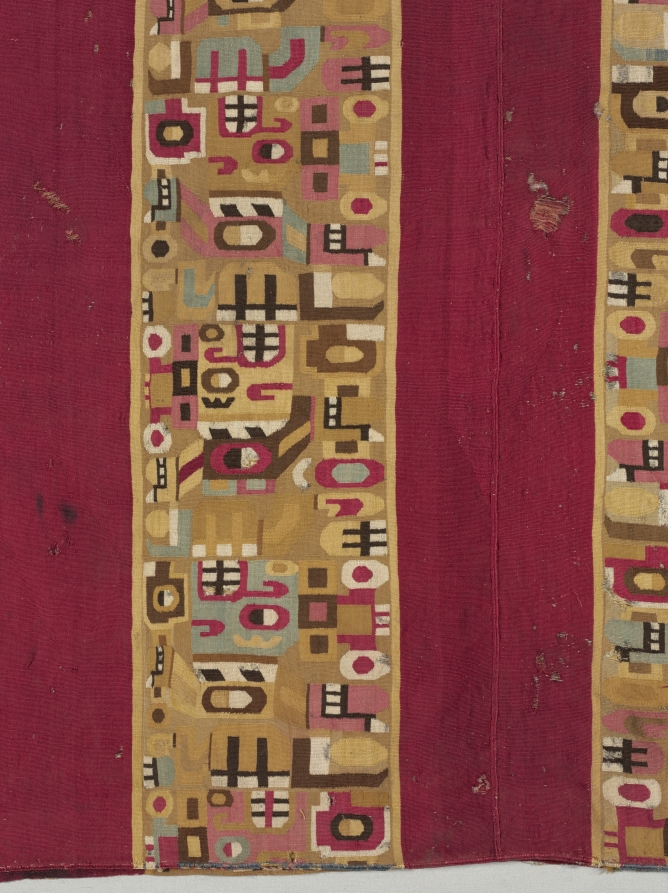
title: Tunic with Sacrificer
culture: South America, Peru, Central Andes, Middle Horizon, Wari people, 7th-11th century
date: 600–1000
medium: camelid-fiber, cotton; tapestry weave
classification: Textile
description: An extremely abstract supernatural sacrifice repeats in different colors and orientations across the body of this tunic, which was shortened on one side in antiquity. Look for the toothy black-and-white mouth in the sacrificer's upward-gazing head; other facial features include a button nose and a vertically divided eye. The figure holds the L-shaped haft of an axe behind its back and, at the front of its body, a short staff with a severed, upside-down human head on the top.